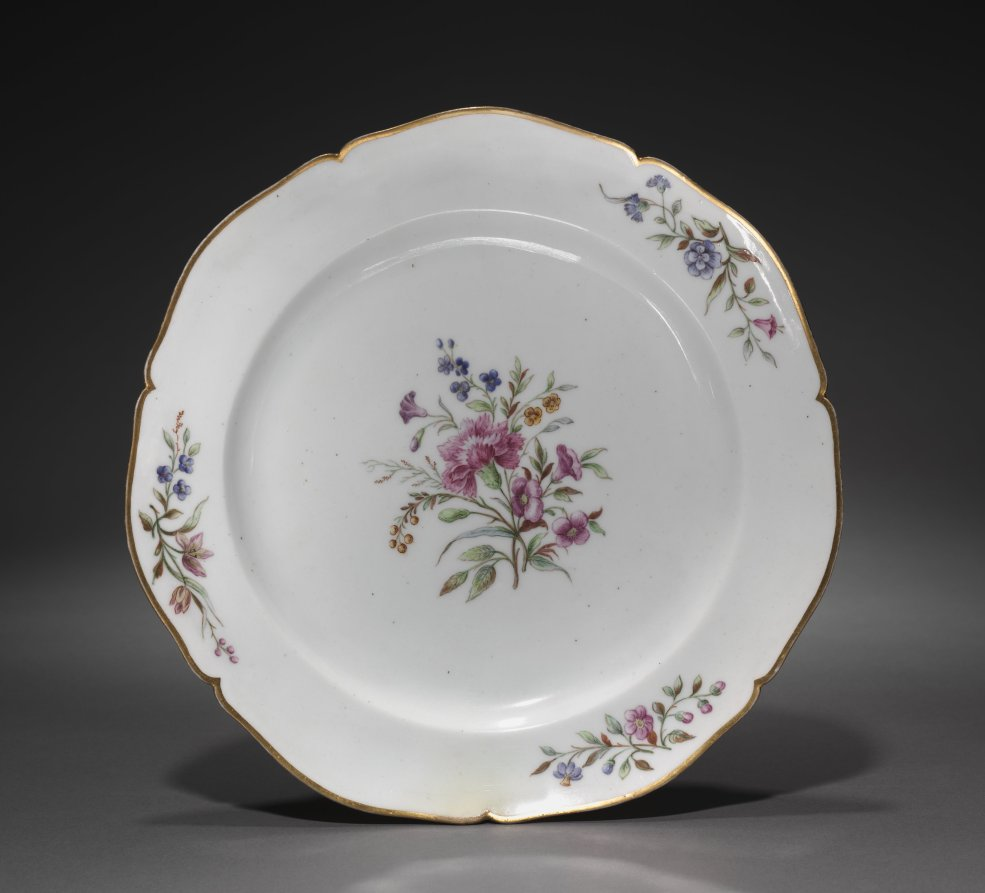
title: Plate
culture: France, Vincennes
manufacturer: Vincennes Porcelain Factory (France, 1740–56)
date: c. 1748–51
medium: porcelain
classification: Ceramic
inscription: Interlaced L's with dot above